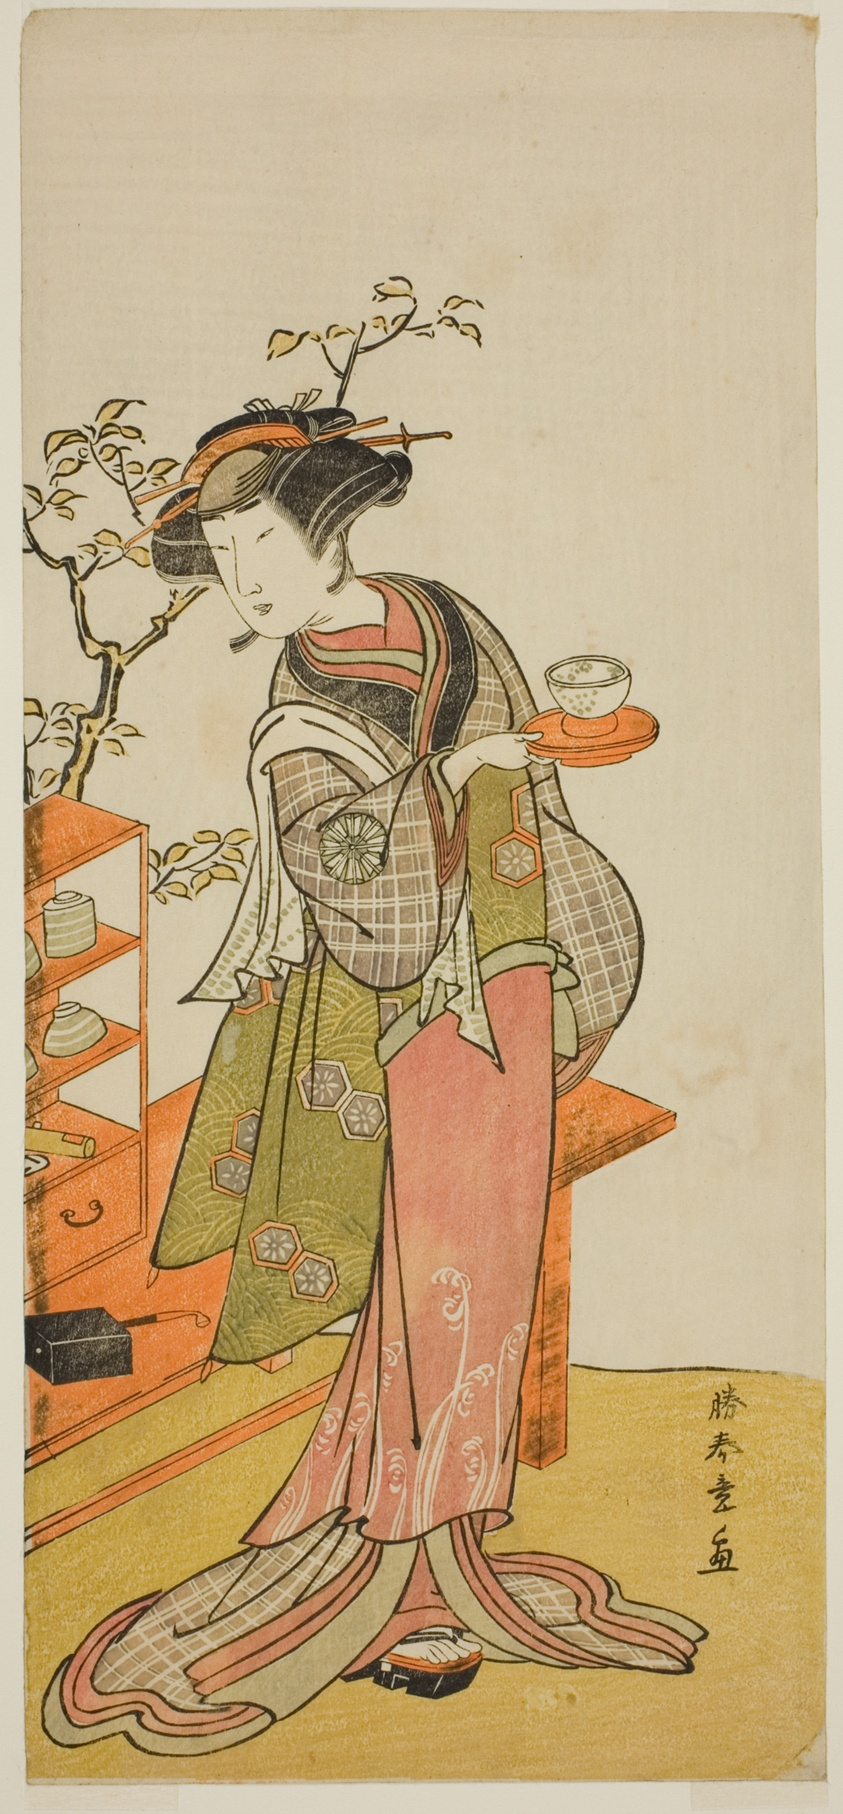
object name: Print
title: The Actor Nakamura Tomijuro I as the Waitress Otake in the Play Chigo Suzuri Aoyagi Soga, Performed at the Nakamura Theater in the First Month, 1777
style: Japanese (culture or style)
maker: Katsukawa Shunsho 勝川 春章; Japanese, 1726-1792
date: c. 1777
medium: Color woodblock print; hosoban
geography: Japan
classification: woodblock print; print; asian art